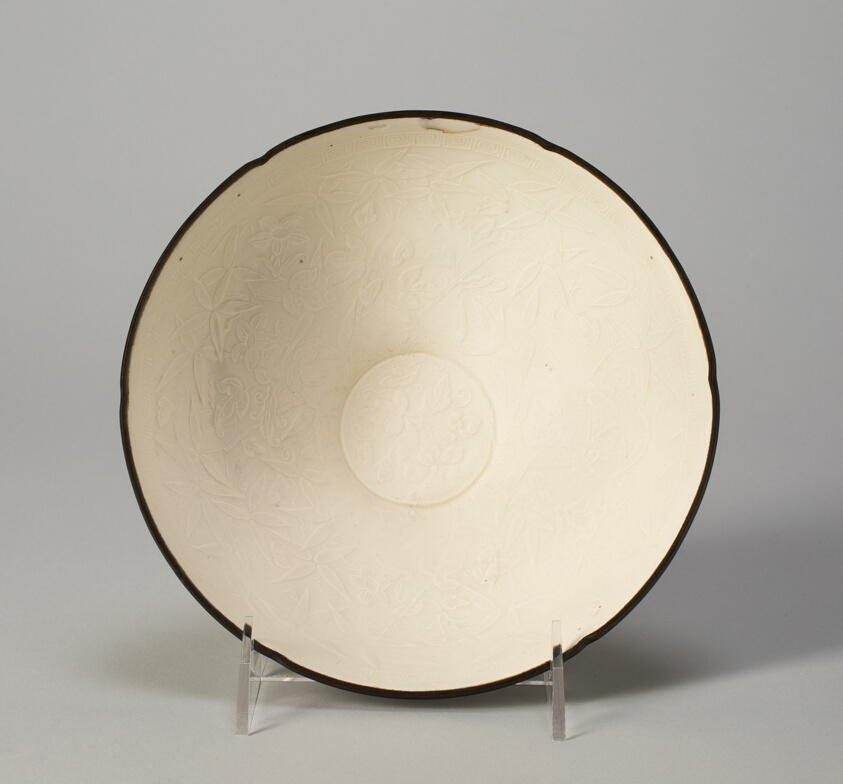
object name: Vessel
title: Six-Lobed Bowl with Bamboo, Morning Glories, and Spray of Cherry Blossoms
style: Chinese (culture or style)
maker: China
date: Jin dynasty (1115–1234), 12th century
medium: Ding ware; porcelain with underglaze mold-impressed decoration; metal rim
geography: China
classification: bowl; porcelain; dish (vessel); asian art; ceramics; vessel